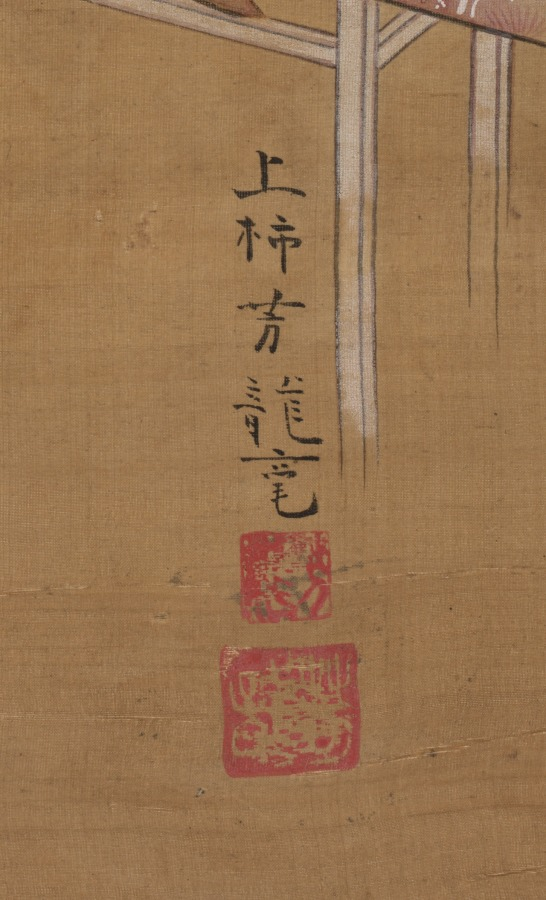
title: Courtesan Seated on a Bench Enjoying the Evening Cool in Summer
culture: Japan, Edo period (1615–1868)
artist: Kamigaki Hōryū (Japanese, dates unknown)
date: 1615–1868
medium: hanging scroll, ink and color on silk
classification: Painting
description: In a pensive pose with her chin resting in her hand, a courtesan is seated on a wooden bench that extends diagonally across the lower half of the scroll. Her open robe suggests that it is a warm evening-perhaps late summer or early fall, as indicated by the grapevine pattern on her kimono. The floral patterns in the composition hint at the seasons: the plum blossom on the fan for spring; grape pattern on the robe for late summer; and chrysanthemum design on the bench indicating autumn. Note also how the grapevine pattern in the painting's mounting mimics the design of her kimono. The overall mood is one of intimacy, created by Hõryþ through the delicate rendering of the courtesan's facial features and hands. In contrast to the other scrolls of beauties nearby, the artist here portrayed his subject with little background, allowing her grace and elegance to carry the picture.